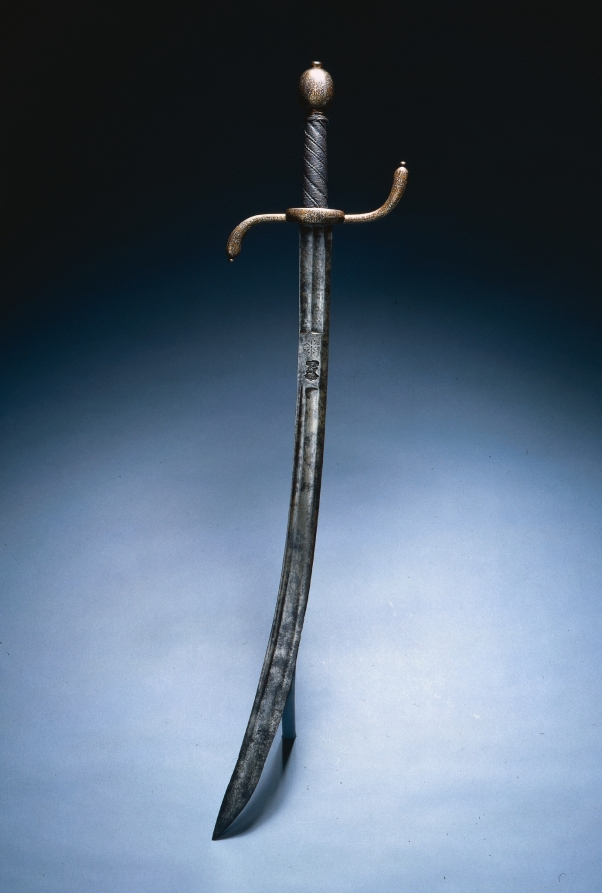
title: Hanger (Hunting Sword)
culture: Hilt: Italy (?); Blade: Germany, Saxony, late 16th-17th Century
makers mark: Jaspar Bongen the Younger (German, active late 1600s)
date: late 1600s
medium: steel; gold and silver damascened hilt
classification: Arms and Armor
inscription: "1553" (Presumed to be a commemorative date)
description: Damascening, the technique of hammering gold and silver wires into grooves cut to receive them, enlivens this sword's hilt. Further texture was added with wires to improve the user's grip, which allowed him to hunt with more control and accuracy. Hunting was a popular sport among the wealthy and many nobles owned tracts of forest, but peasants were prohibited from hunting on these lands.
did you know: The swordsmith's mark, a crowned stag visible on the blade below the hilt, is unidentified.